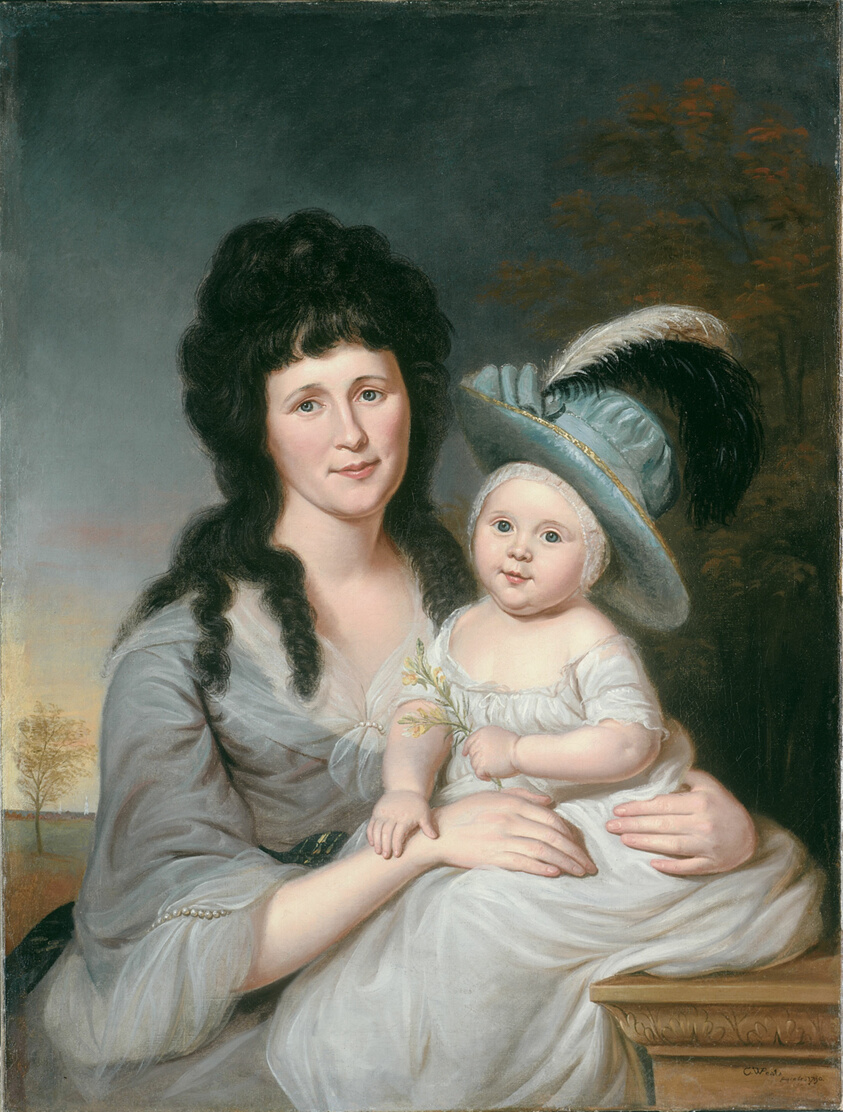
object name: Painting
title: Mrs. John Nicholson (Hannah Duncan) and John Nicholson, Jr.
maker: Charles Willson Peale (American, 1741–1827)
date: 1790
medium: Oil on canvas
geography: Philadelphia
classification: painting; american arts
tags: fashion, children, people, portraits